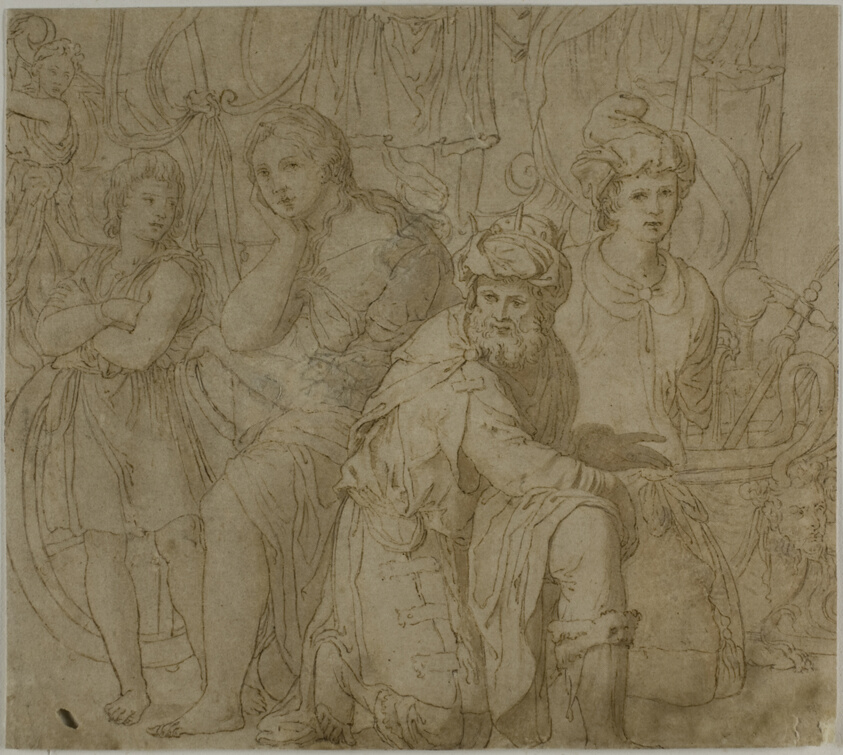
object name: Drawing and Watercolor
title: Part of The Truimph and Exploits of Furius Camillus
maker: Francesco de'Rossi, called Salviati, after; Italian, 1510-1563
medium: Pen and brown ink, with brush and brown wash, over traces of black chalk, on tan laid paper, laid down on ivory laid paper, edge mounted to blue card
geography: Italy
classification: ink with wash; drawings (visual works); prints and drawing